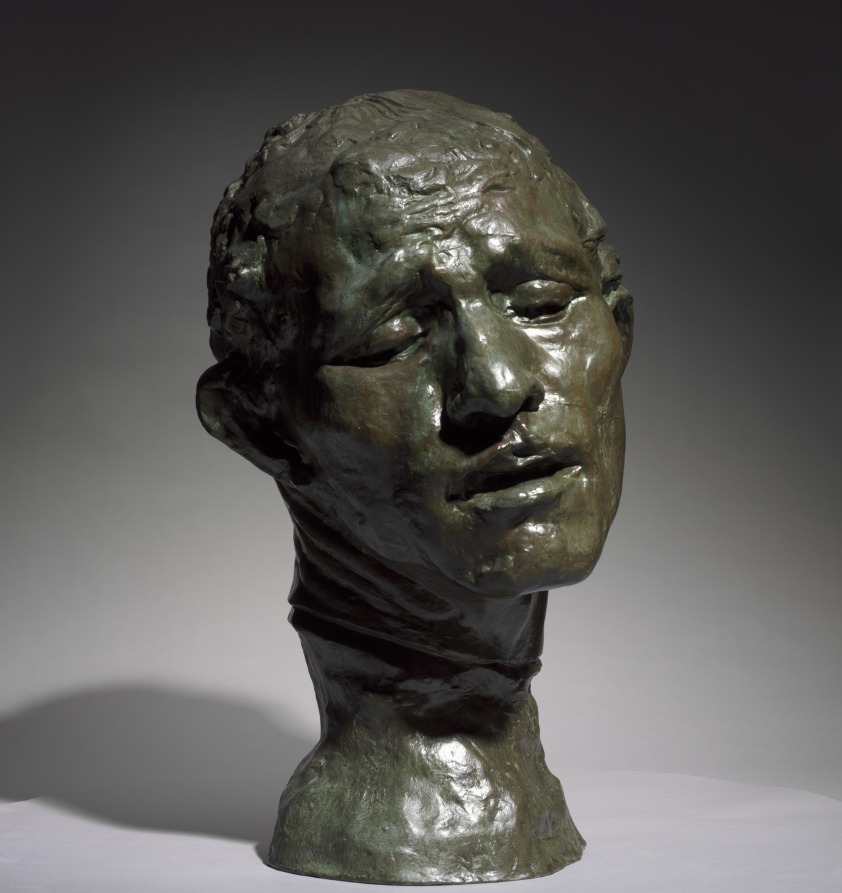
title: Heroic Head of Pierre de Wissant, One of the Burghers of Calais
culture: France, 19th century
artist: Auguste Rodin (French, 1840–1917)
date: 1886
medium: bronze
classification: Sculpture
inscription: inscribed at neck, left: A.Rodin; inscribed lower back: Alexis Rudier/Fondeur-Paris.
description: This sculpture depicts one of the figures in Rodin’s large public monument The Burghers of Calais (1884–89), featuring six French men who volunteered to be taken prisoner by the English in exchange for lifting the siege of Calais during the Hundred Years War (1337–1453). Pierre de Wissant’s anguished expression suggests extreme mental suffering as he contemplates his expected execution. Rodin exhibited a life-size version of the figure as an independent work before completing the monument. He later made multiple versions in various sizes and media.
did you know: This sculpture depicts the head of a figure from Rodin's large public monument The Burghers of Calais (1884-89). The CMA also owns a plaster version of the head.